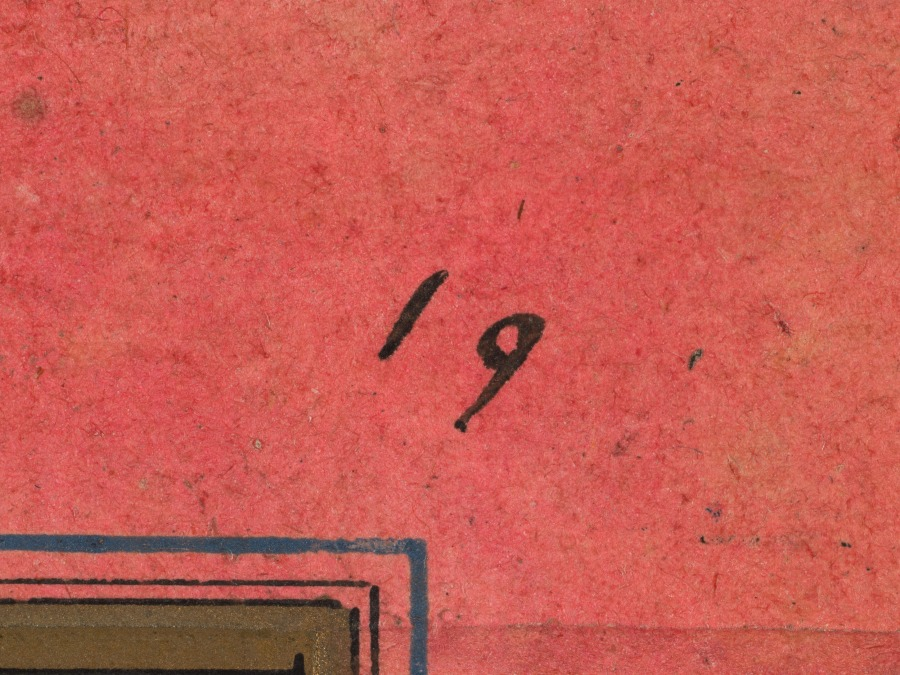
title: A prince riding a composite elephant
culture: India, Golconda, Deccan, 16th century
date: c. 1590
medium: Gum tempera, ink, and gold on paper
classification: Painting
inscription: Inscriptions: Calligraphy of Persian verses in top and bottom borders, in nasta‘liq script: Central verse (half-line on top, the other below the elephant’s feet): Given the foretold lackluster fortune of this abject servant Nothing is writ save words of your bounty Diagonal verses on top: The angelic beauties of paradise with their anxious dark-eyes set on the road Their glances throwing gold coins on the path (as a welcome) Diagonal verses below: The glittering full face of the sun is no more than a single drop From the perspiration behind his ear.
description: A prince sits cross-legged in a covered howdah seat secured to the back of a royal elephant with golden rings on its tusks. The elephant is being driven by attendants, one of whom holds a goad. Artists in the southern Indian region known as the Deccan expanded upon Persian practices of embedding creatures in landscape scenes—like a visual double-entendre—and created inventive images of composite creatures made up of figures that invite extended close looking. This painting would have been mounted in an album that was brought out for entertainment in elite intimate gatherings.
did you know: Two lions share one head at the top of the elephant’s head.